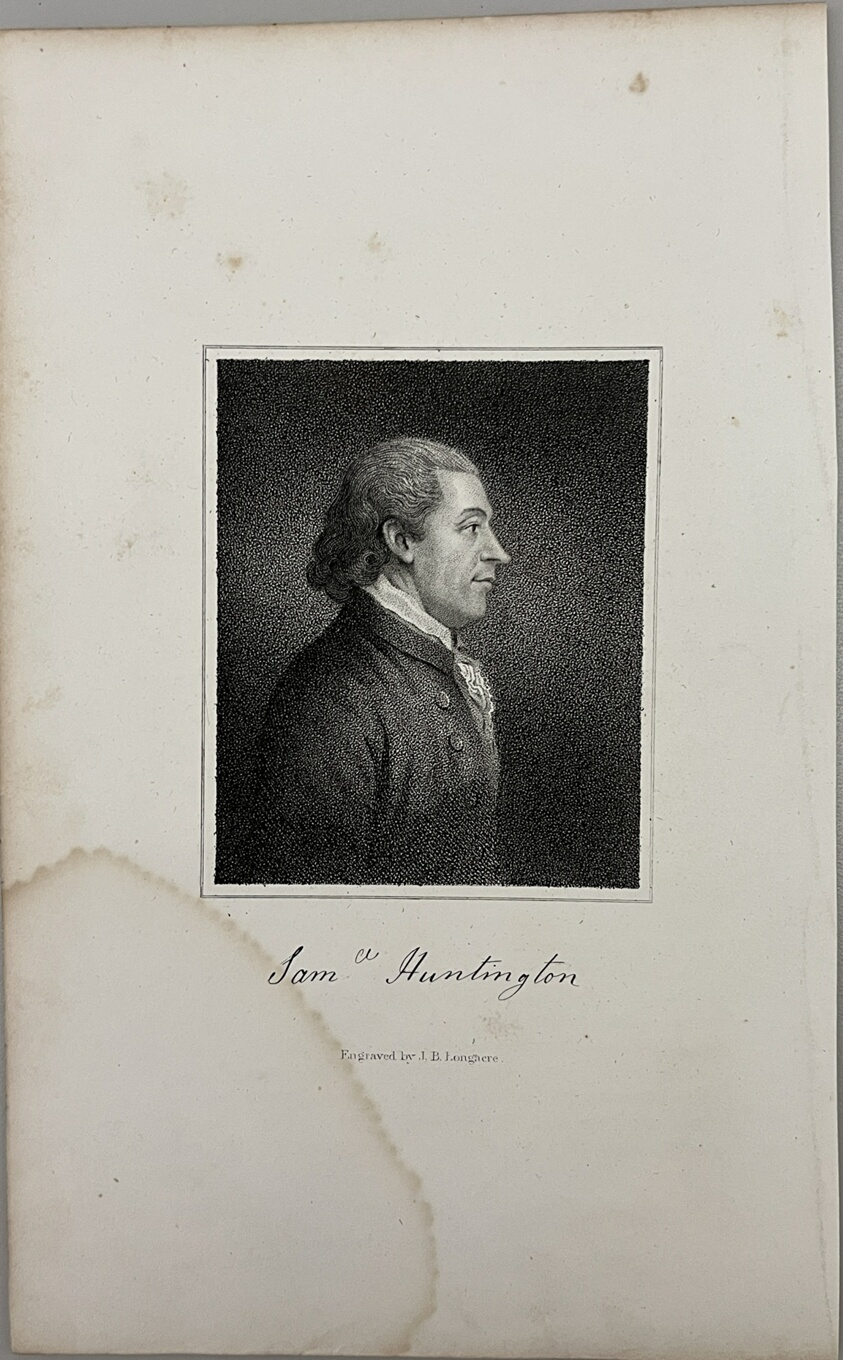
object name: Print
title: Samuel Huntington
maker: James Barton Longacre (American, 1794-1869)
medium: Stipple and line engraving on paper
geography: United States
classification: reproduction; print; prints and drawing